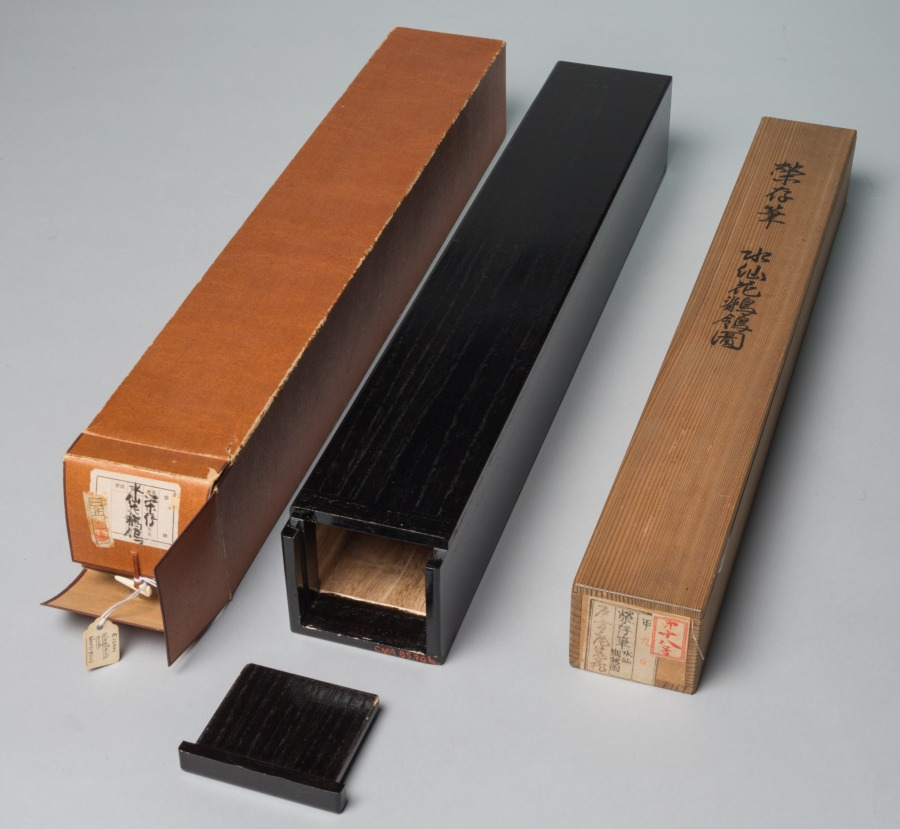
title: Wagtails and Narcissus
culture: Japan, Muromachi period (1392–1573)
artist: Eison (Japanese)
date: mid-1500s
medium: hanging scroll; ink on paper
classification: Painting